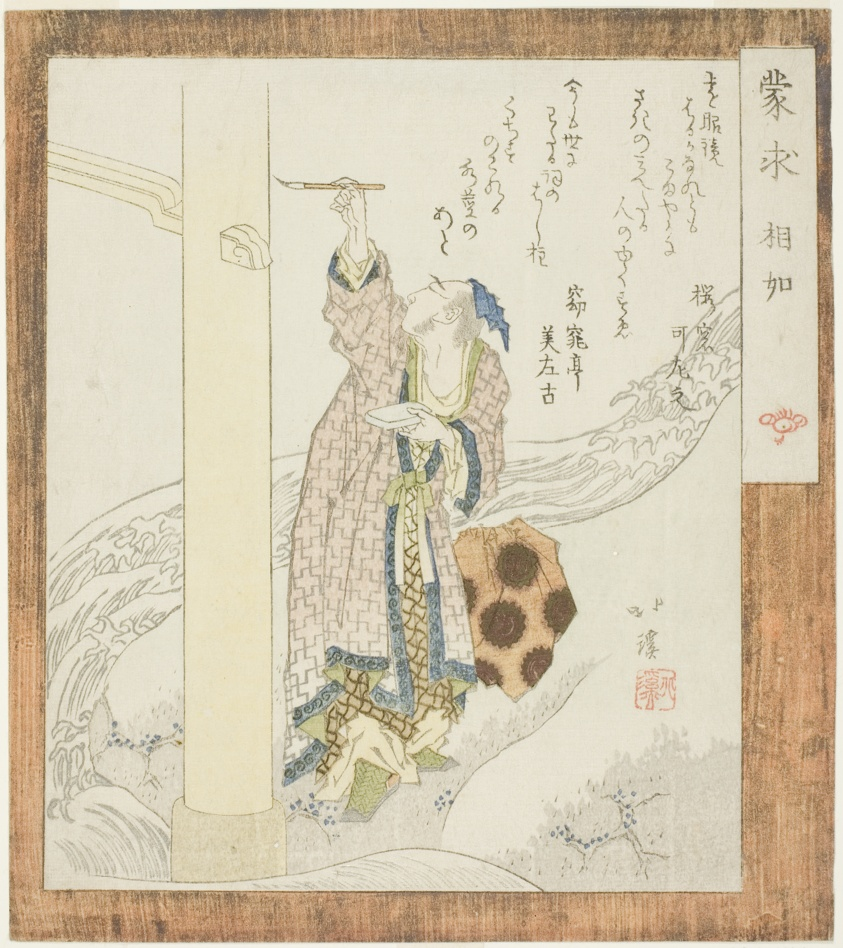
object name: Print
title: Xiangru (Jp: Shojo), from the series "Meng Qiu (Jp: Mogyu)"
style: Japanese (culture or style)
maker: Totoya Hokkei (Japanese, 1780-1850)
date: c. 1821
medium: Color woodblock print; shikishiban, surimono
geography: Japan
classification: woodblock print; print; asian art